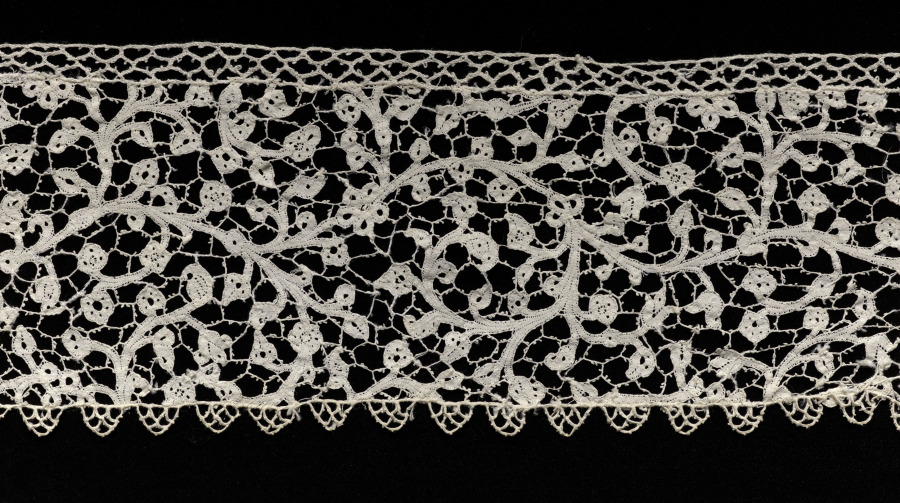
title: Lace Border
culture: Italy, Milan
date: 1600s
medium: Linen: bobbin lace (bride ground)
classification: Lace